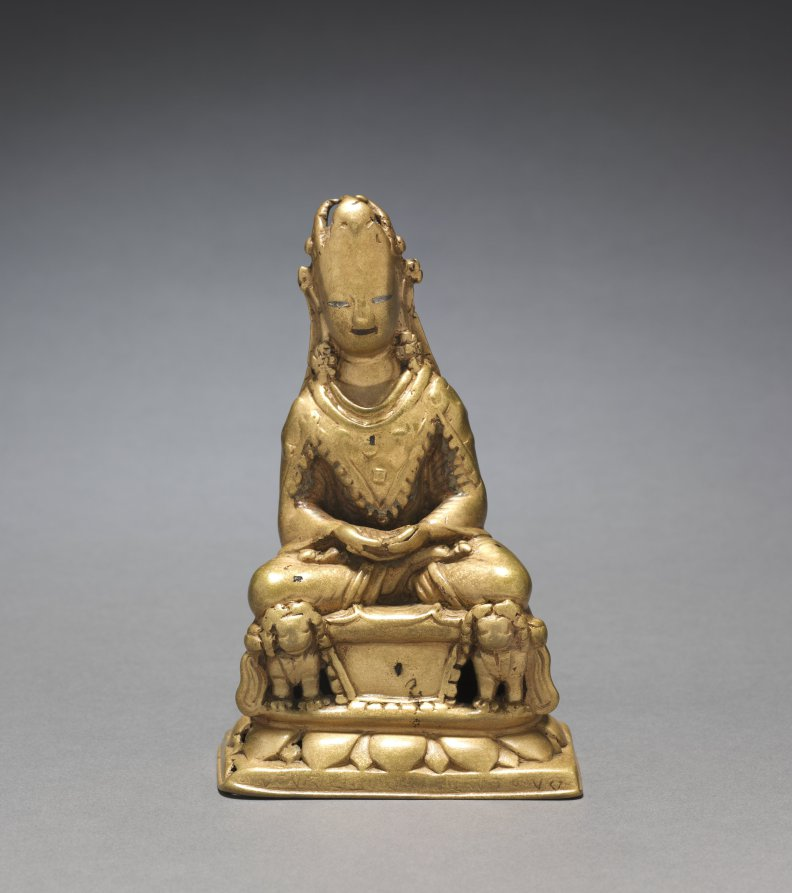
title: Crowned Buddha Seated on a Lion Throne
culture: India, Kashmir, 8th century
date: 700s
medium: brass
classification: Sculpture